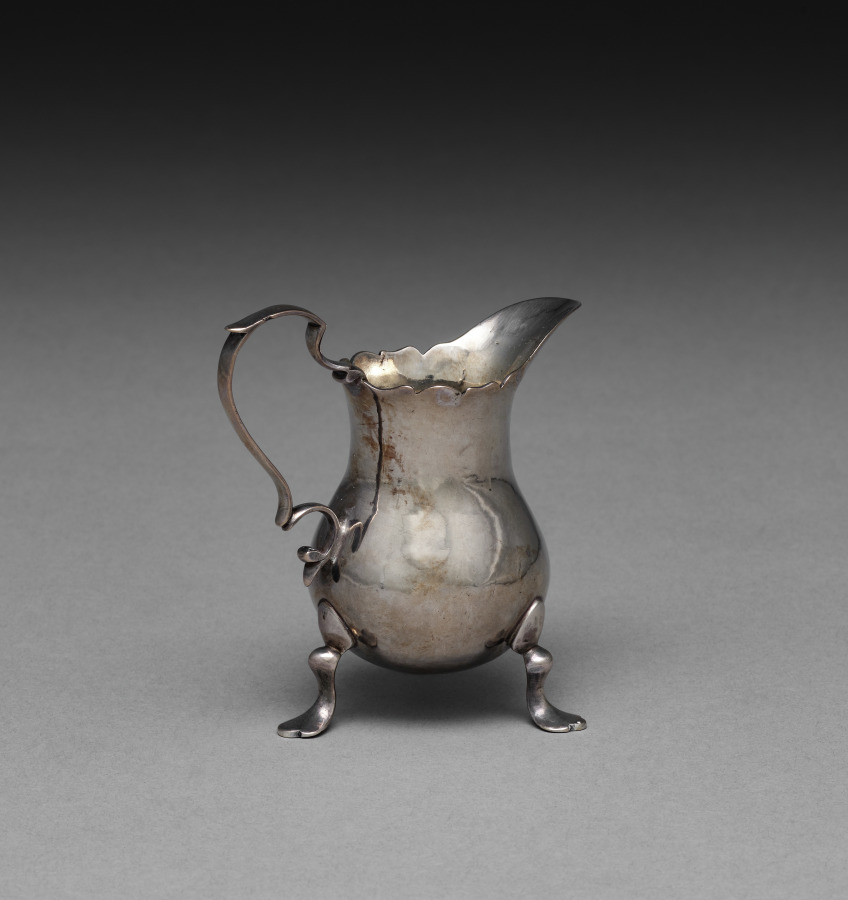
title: Cream Jug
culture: America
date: c. 1760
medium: silver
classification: Silver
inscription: engraved "S" and "D*I" in block letters on bottom along with a treelike device.